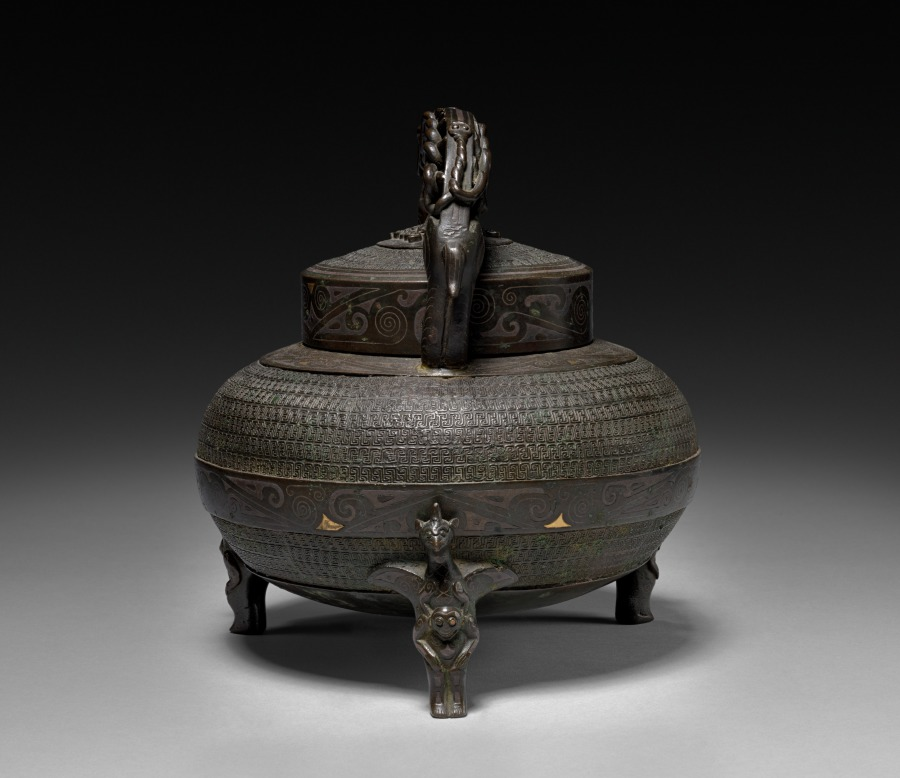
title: Kettle with Handle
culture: China, Qing dynasty (1644-1911) or Republican period (1912-49)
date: 1700s–1800s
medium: bronze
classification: Metalwork